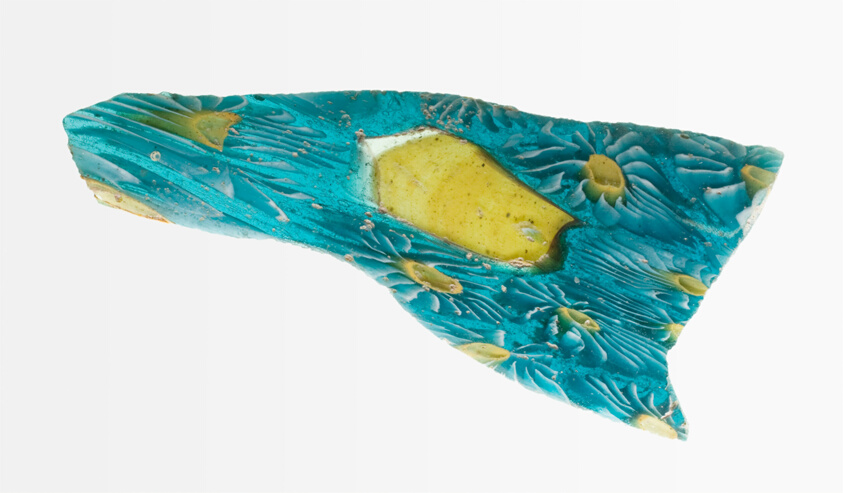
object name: Decorative Arts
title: Bowl Fragment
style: roman (ancient, style or period), ancient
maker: Roman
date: 1st century BCE-1st century CE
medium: Glass, mosaic glass technique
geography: Italy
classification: fragment; bowl; decorative arts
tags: decoration